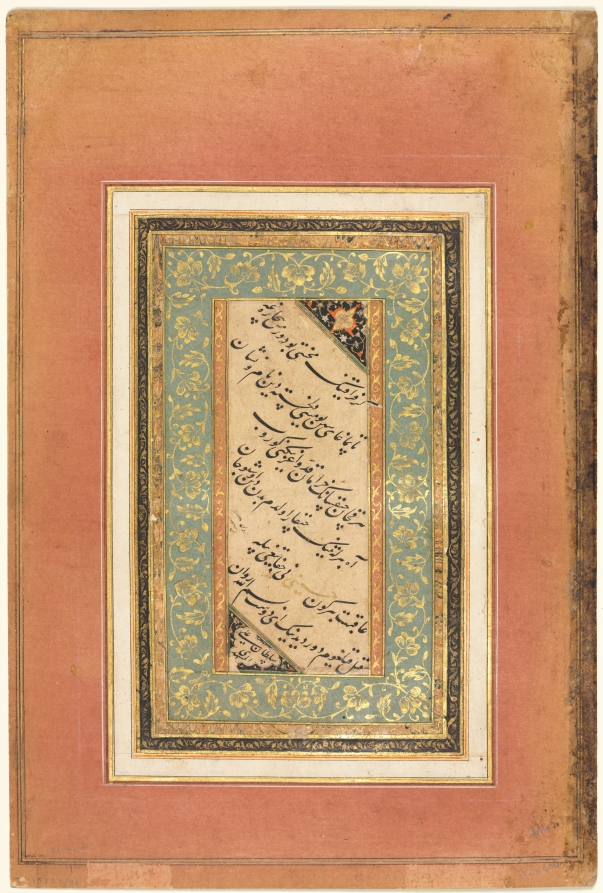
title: Calligraphy, Persian Verses (verso)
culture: Afghanistan, Herat, Timurid period (1370–1501)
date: c. 1440–1520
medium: opaque watercolor, ink, gold and silver on paper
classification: Manuscript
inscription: Signed by Sultan Ali al-Mashhadi